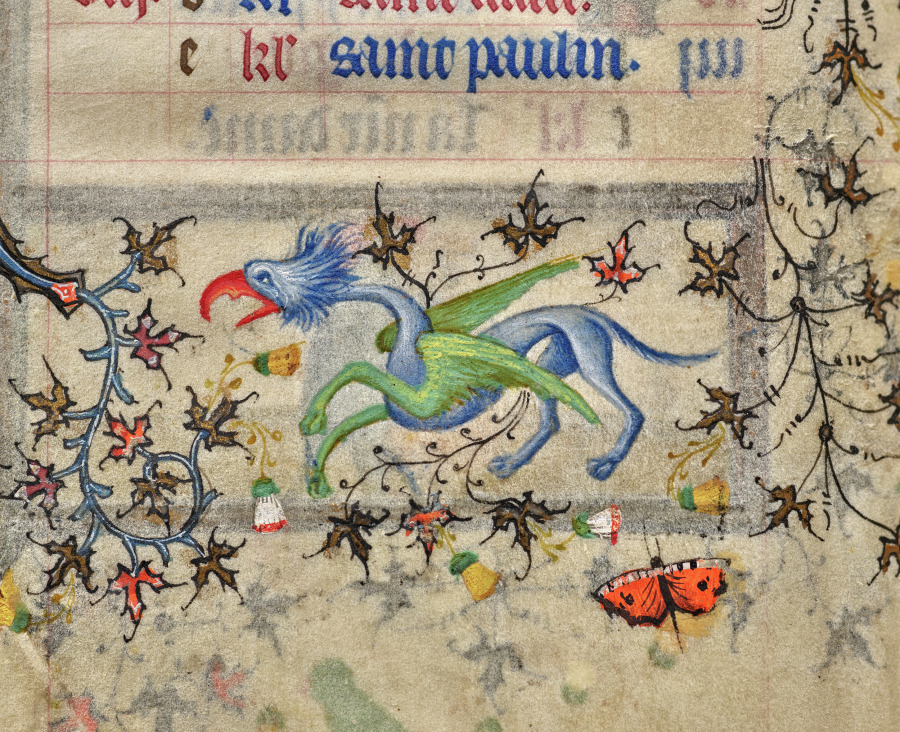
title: Hours of Charles the Noble, King of Navarre (1361-1425): fol. 8v, August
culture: France, Paris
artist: Master of the Brussels Initials and Associates (French)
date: c. 1405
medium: ink, tempera, and gold on vellum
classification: Bound Volume